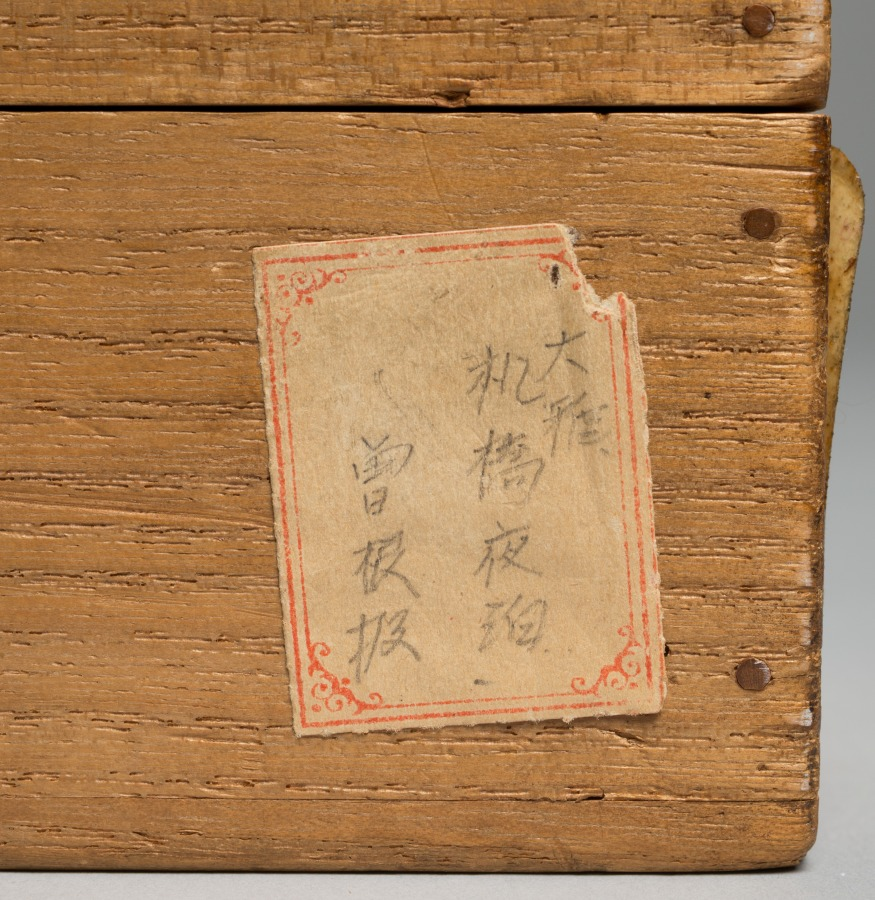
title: Illustration of Zhang Qi's Poem on the Cold Mountain Temple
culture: Japan, Edo period (1615–1868)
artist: Ike Taiga (Japanese, 1723–1776)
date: mid- to late 1700s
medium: hanging scroll; ink and color on paper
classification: Painting